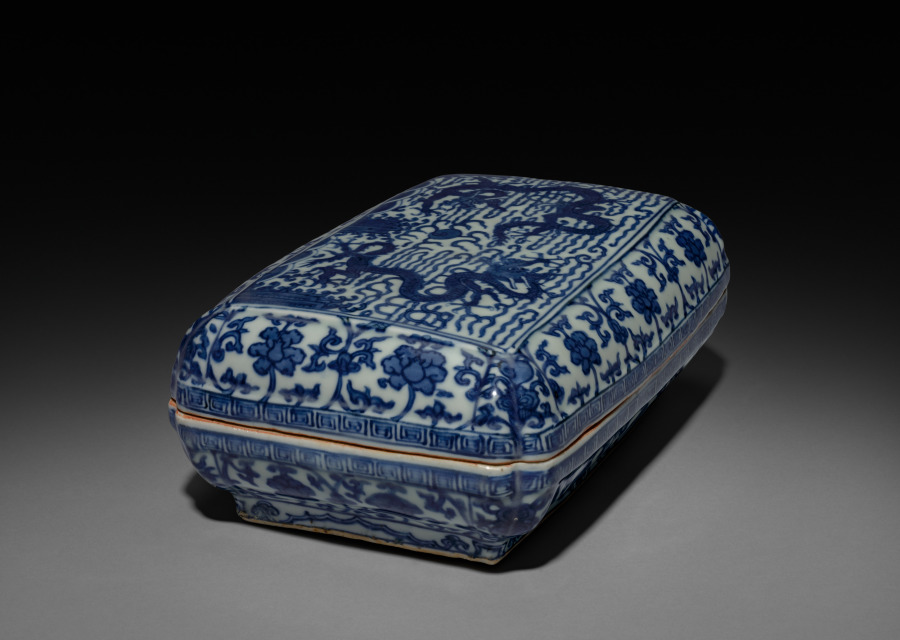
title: Covered Box with Dragons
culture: China, Jiangxi province, Jingdezhen kilns, Ming dynasty (1368-1644), Wanli reign (1572-1620)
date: 1573–1620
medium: porcelain with underglaze blue decoration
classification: Ceramic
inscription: 大明萬曆年製